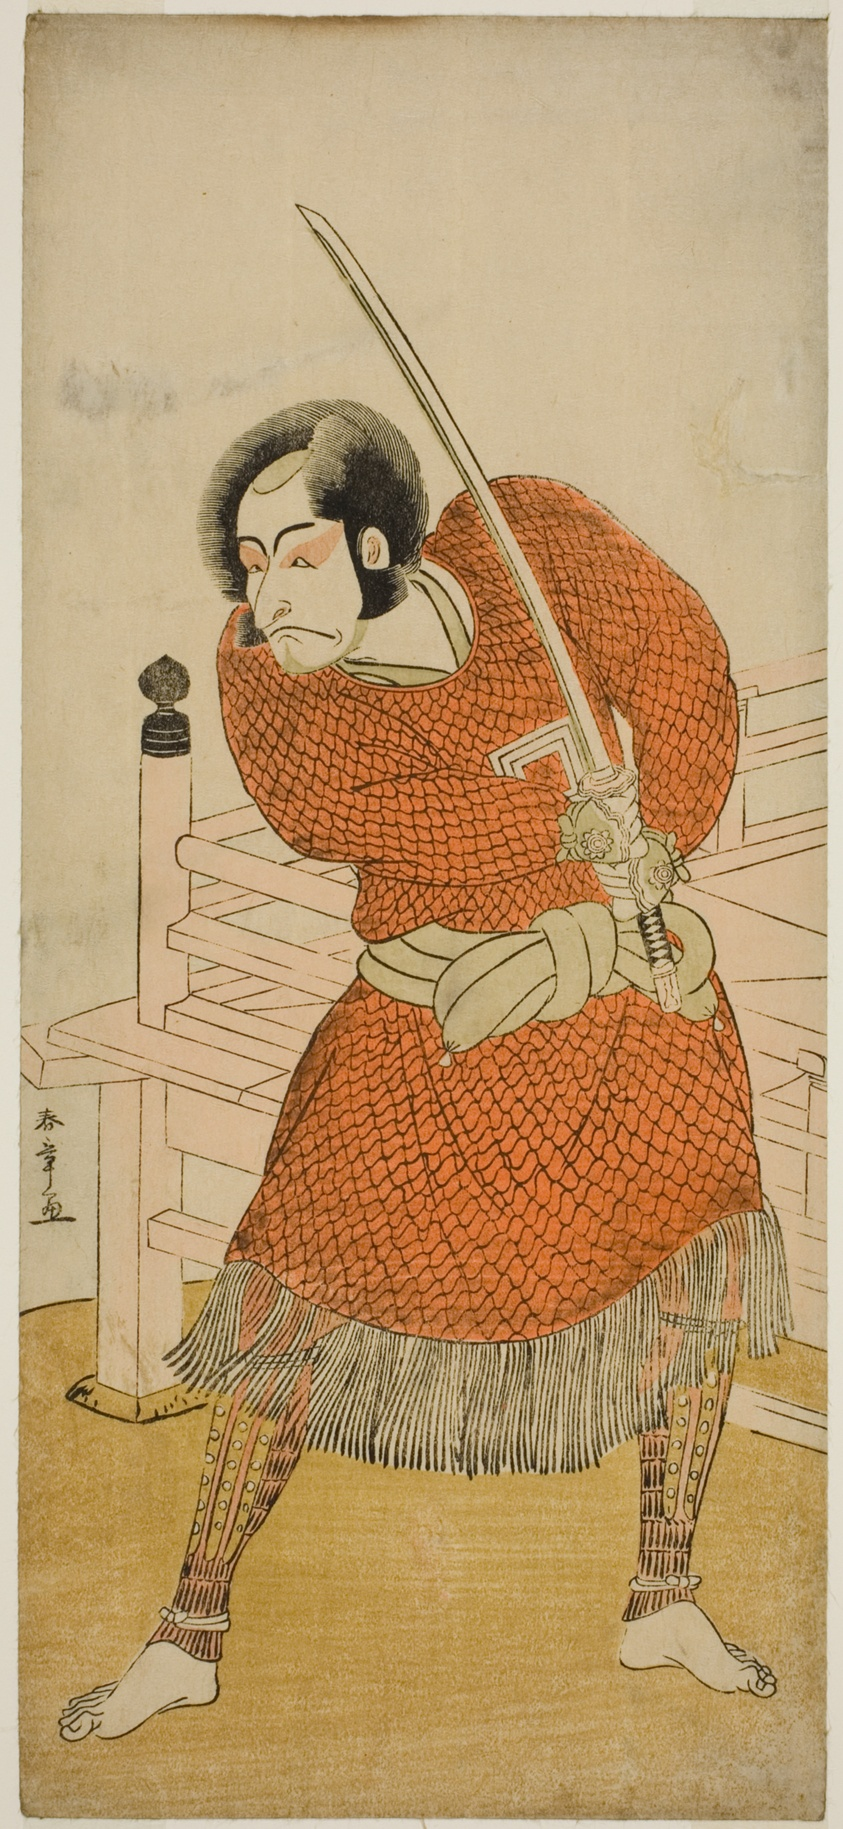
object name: Print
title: The Actor Ichikawa Danjuro V as Abe no Sadato in the Play Oshu Adachi ga Hara, Performed at the Ichimura Theater in the Fifth Month, 1777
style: Japanese (culture or style)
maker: Katsukawa Shunsho 勝川 春章; Japanese, 1726-1792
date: c. 1777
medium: Color woodblock print; hosoban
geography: Japan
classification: woodblock print; print; asian art